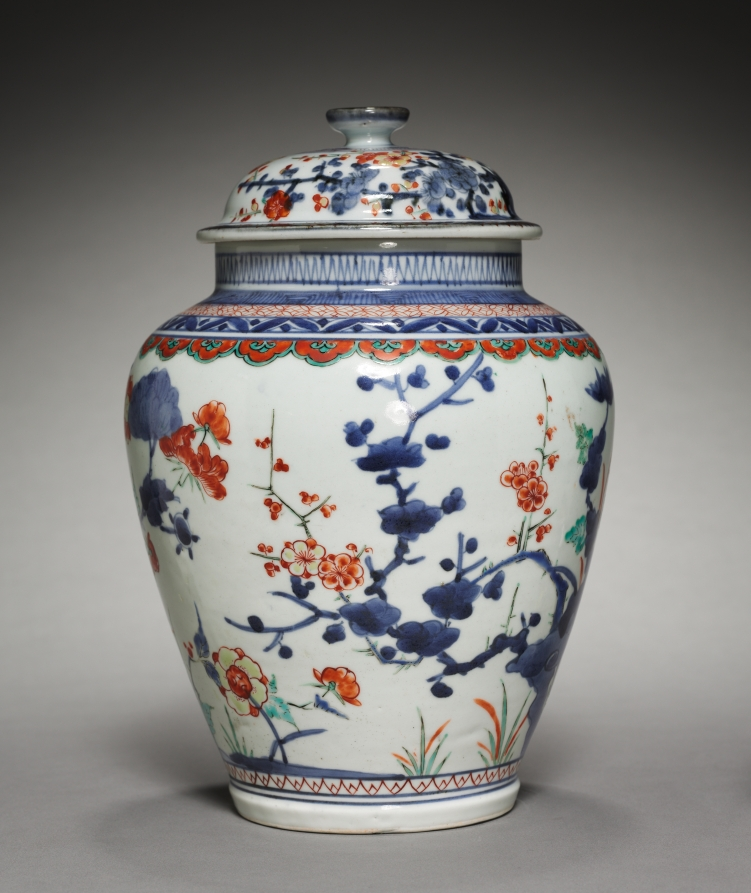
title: Covered Jar with Chrysanthemums, Peonies, and Plum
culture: Japan, Edo period (1615–1868)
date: late 1600s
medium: porcelain with underglaze blue and overglaze color enamel (Hizen ware, Kakiemon type)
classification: Ceramic